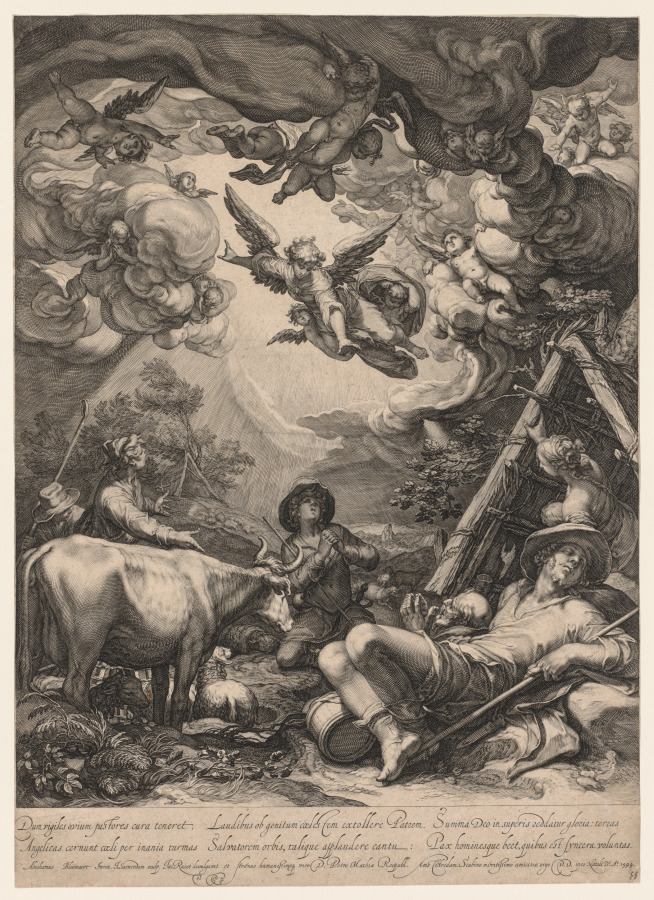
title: The Annunciation to the Shepherds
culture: Netherlands, 16th century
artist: Jan Saenredam (Dutch, 1565–1607)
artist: after Abraham Bloemaert (Dutch, 1566–1651)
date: 1599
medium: engraving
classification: Print